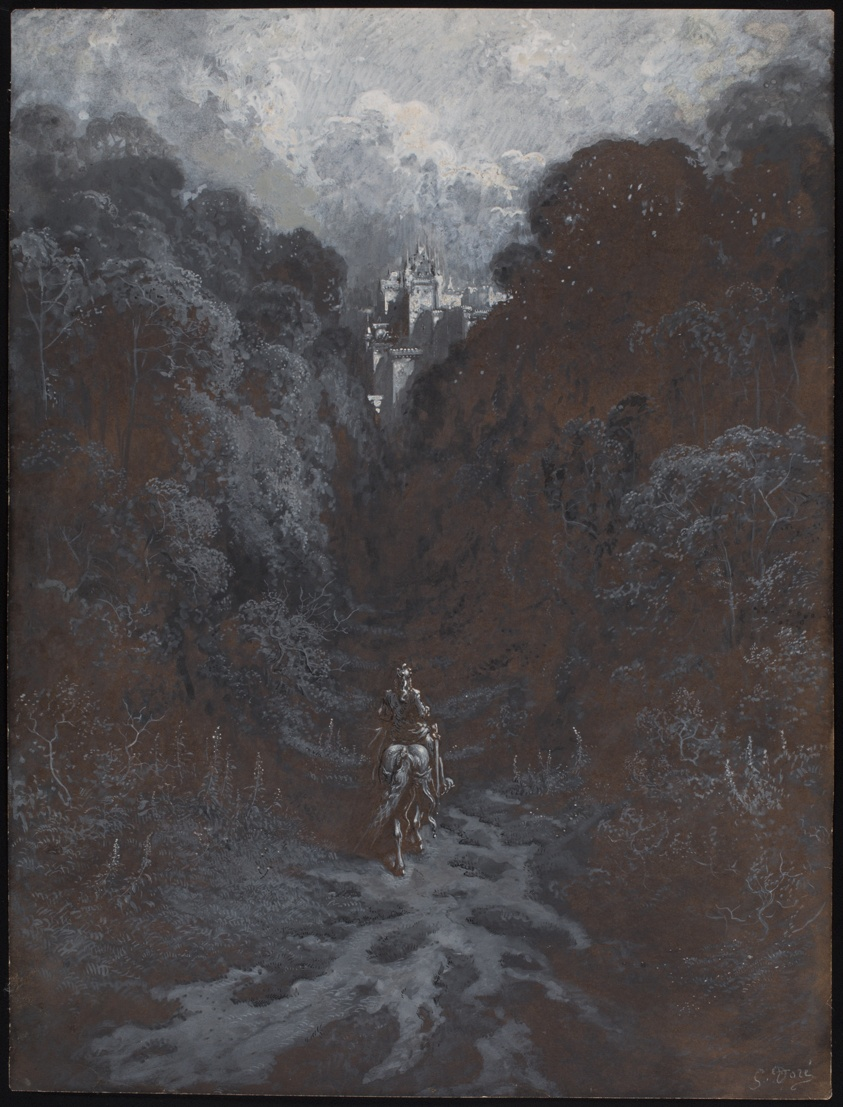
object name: Drawing and Watercolor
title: Sir Lancelot Approaching the Castle of Astolat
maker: Gustave Doré (French, 1832-1883)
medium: Gouache with pen and black ink, heightened with lead white (partially discolored), on cream wove paper prepared with a brown ink ground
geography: France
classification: gouache; drawings (visual works); prints and drawing